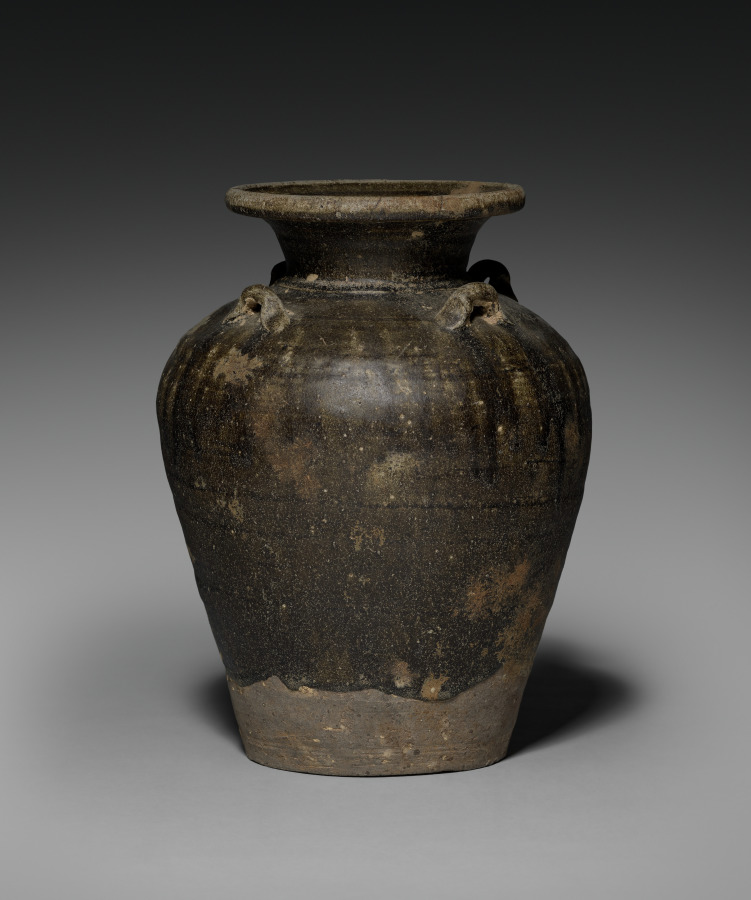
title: Storage Jar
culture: Thailand, Sawankhalok, 14th century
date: 1300s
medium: stoneware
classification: Ceramic